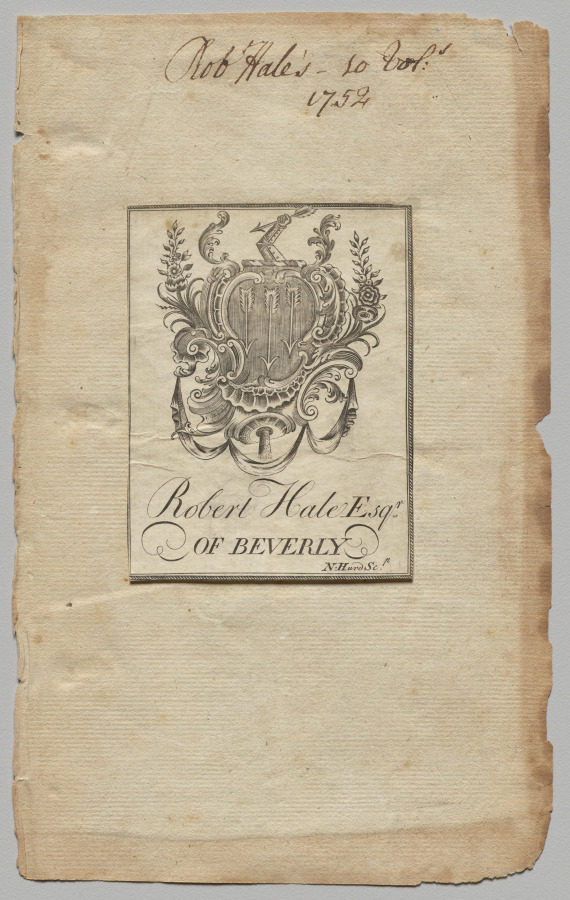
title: Bookplate: Coat of Arms with Robert Hale, Esq. inscribed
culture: America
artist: Nathaniel Hurd (American, 1730–1778)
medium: engraving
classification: Print